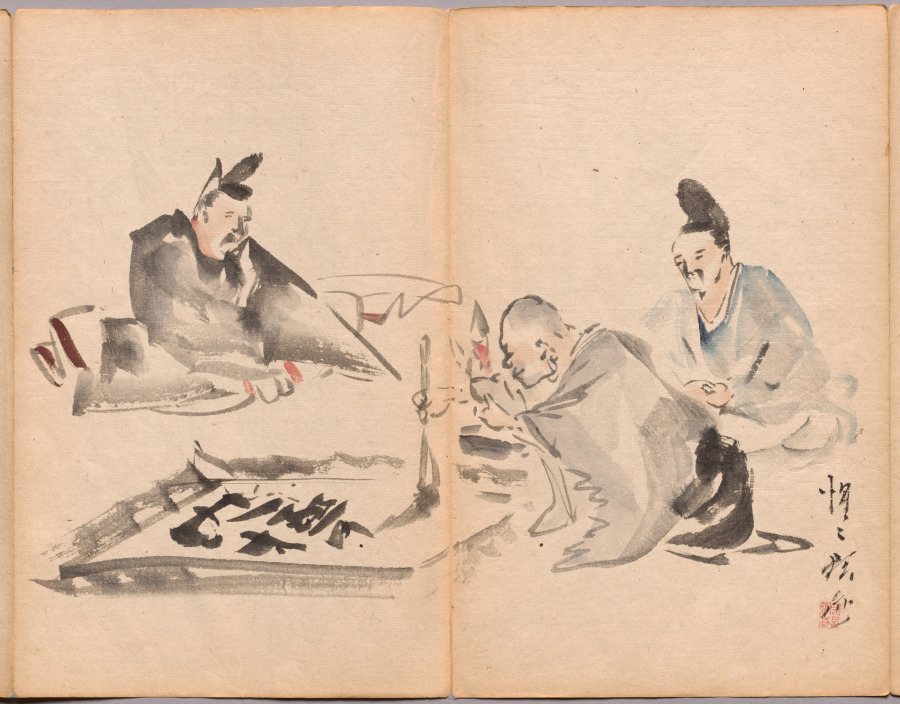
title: Monk at Calligraphy from Sketch Album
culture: Japan, Edo period (1615–1868) to Meiji period (1868–1912)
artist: Kawanabe Kyōsai (Japanese, 1831–1889)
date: mid- to late 1800s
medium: Accordion-style book of 26 double-leaves; ink and color on paper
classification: Bound Volume